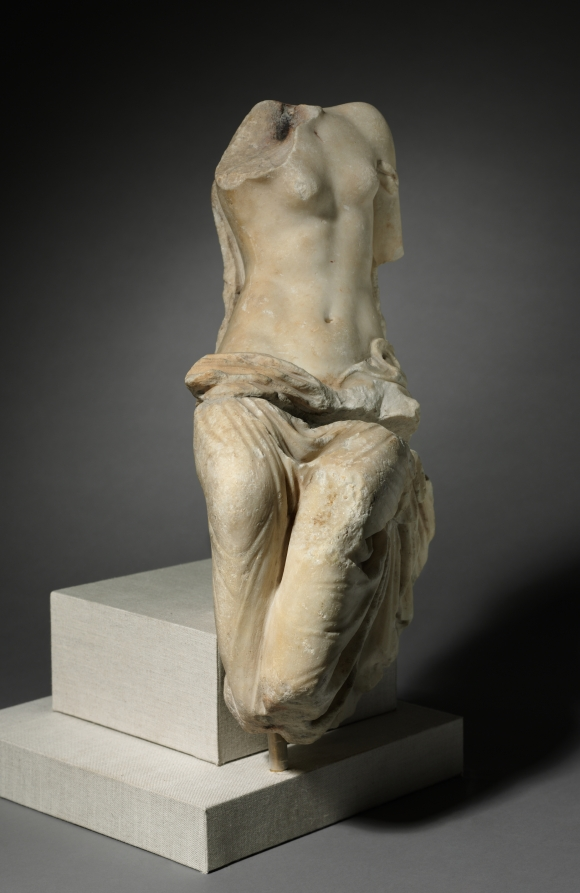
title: Seated Figure of a Woman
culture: Italy, Roman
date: 1–200 CE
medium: marble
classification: Sculpture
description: Although the original subject of this ancient Roman statue fragment is unknown, the cut stone at the back of its base indicates that the statue rested on a ledge, probably incorporated into a larger sculptural group. The nude upper body and relaxed pose suggest an alluring mythical woman, like Venus or a nymph, a beautiful female spirit that embodies elements of nature such as water, woods, or mountains.